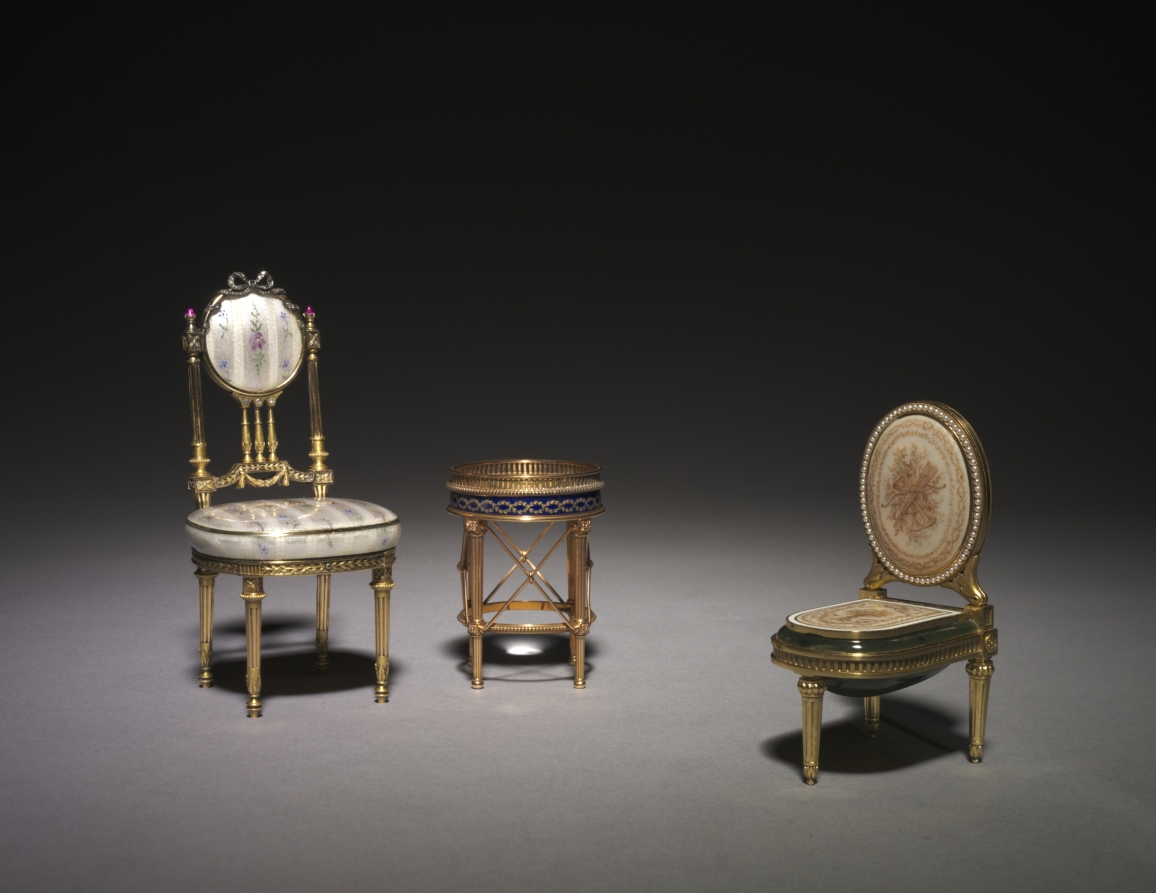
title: Miniature Table with Compass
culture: Russia, St. Petersburg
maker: House of Fabergé (Russian, 1842–1918)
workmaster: Mikhail Evlampievich Perkhin (Russian, 1860–1903)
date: c. 1890–95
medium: gold, enamel, glass, steel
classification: Miscellaneous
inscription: 56, crossed anchors [assay mark for St. Petersburg, 1882-99]; initials of workmaster Mikhail Perkhin (in Cyrillic); Fabergé (in Cyrillic).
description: The giving of small precious objects as intimate gifts between family members within the imperial court was spurred by the House of Fabergé's seemingly endless supply of bejeweled utilitarian objects decorated as expensively as possible, such as this little desk compass disguising as a miniature table in the Louis XVI taste of the late 1700s.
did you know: A small compass is concealed in the top of this miniature table for use when looking at maps.